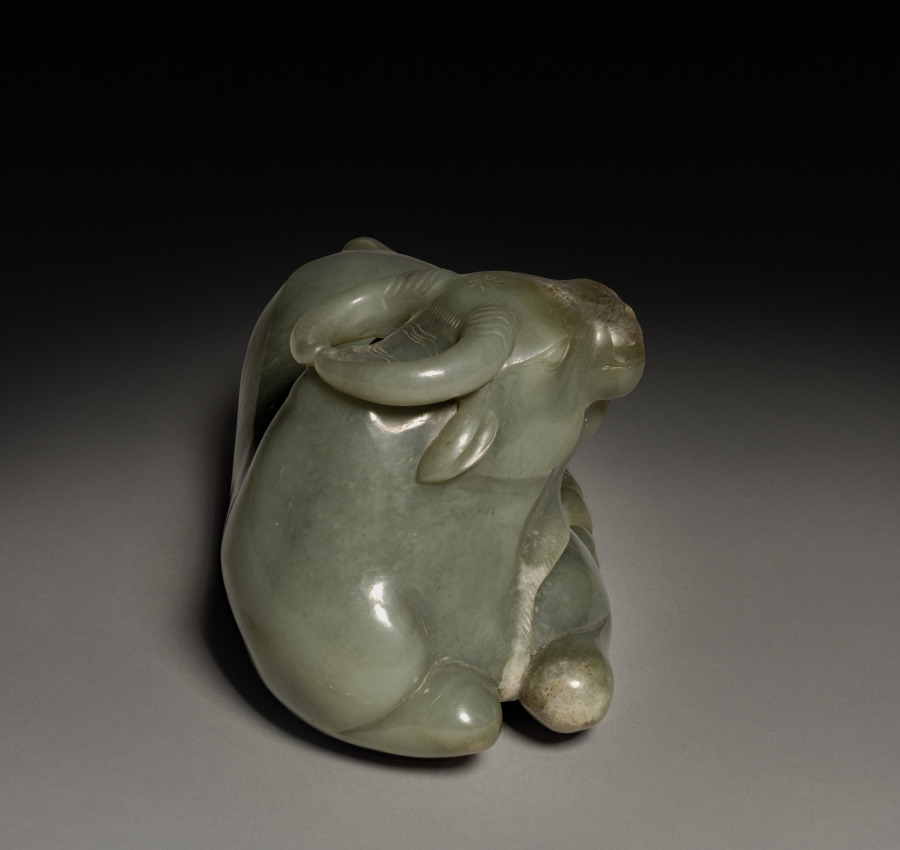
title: Reclining Water Buffalo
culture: China, Qing dynasty (1644-1911)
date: 1644–1911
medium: jade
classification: Jade